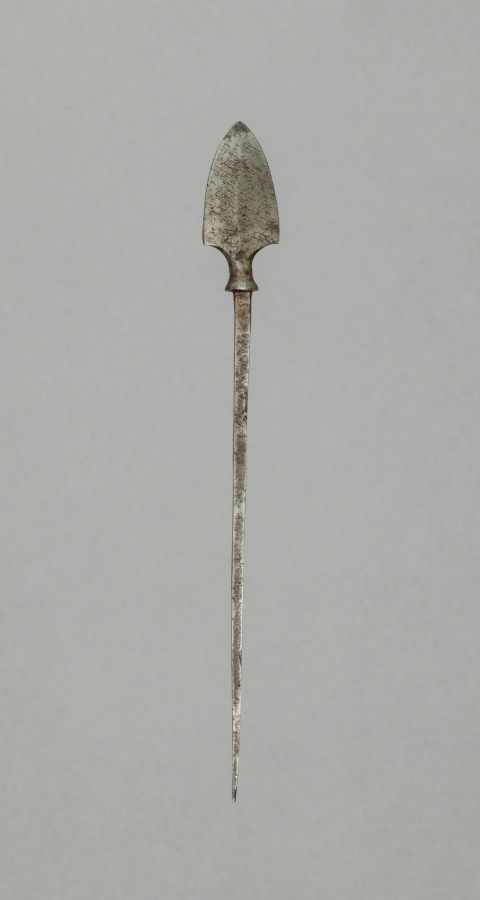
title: Arrow Point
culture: Japan, Edo period (1615–1868)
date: 1700s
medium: steel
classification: Arms and Armor